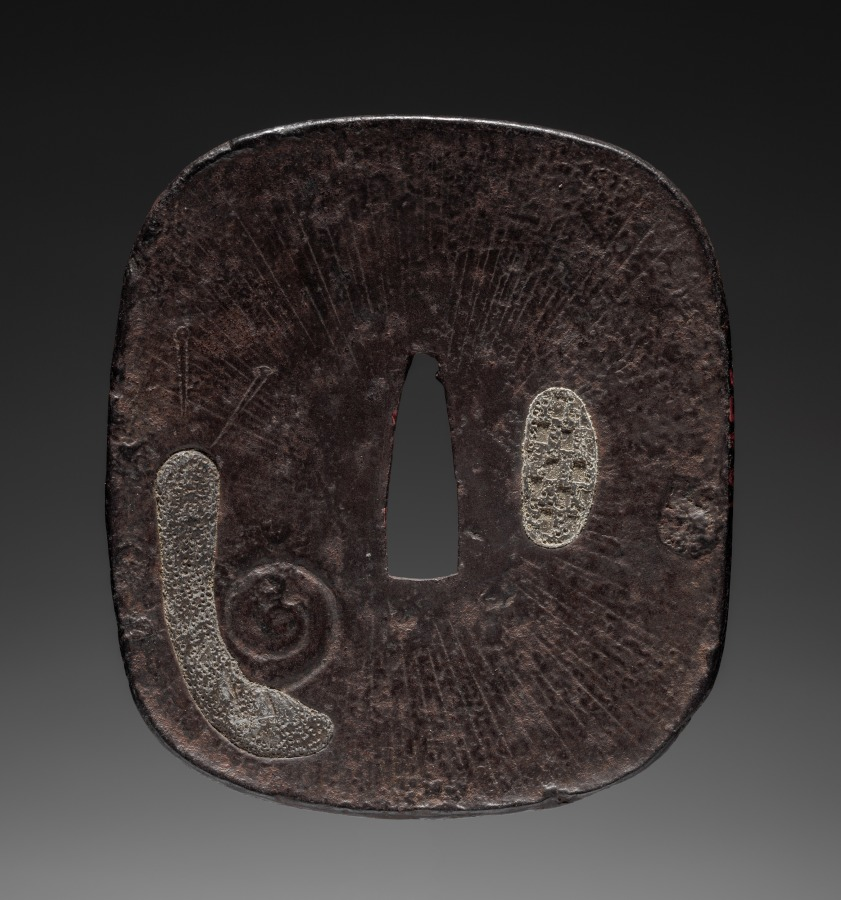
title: Sword Guard (Tsuba) with Snail and Gourd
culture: Japan, possibly Edo period (1615-1868)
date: c. 1615–1868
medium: iron with lead inlay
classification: Arms and Armor